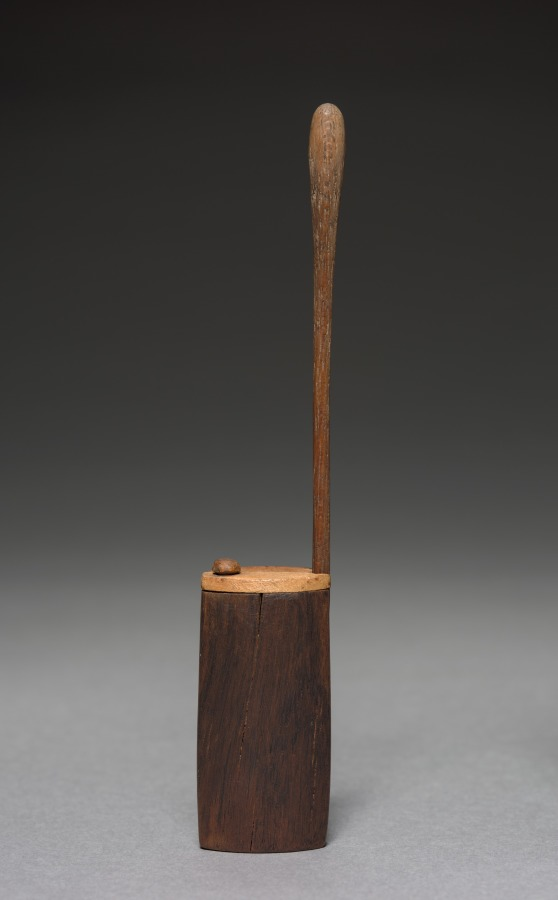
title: Kohl Container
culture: Egypt, New Kingdom (1540–1069 BCE), Dynasty 18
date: 1540–1296 BCE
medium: wood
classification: Cosmetic Objects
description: Cosmetic vessels would have once contained scented oils or ointments used for beautifying the body, while kohl containers held the eye paint seen in many depictions of ancient Egyptians. Galena, a mineral used in eye paint, helped reflect the sun and repelled insects and tiny organisms that could cause eye disease and blindness. Cosmetics were an essential element of daily life and associated with upholding the ancient Egyptians’ high standards of cleanliness.